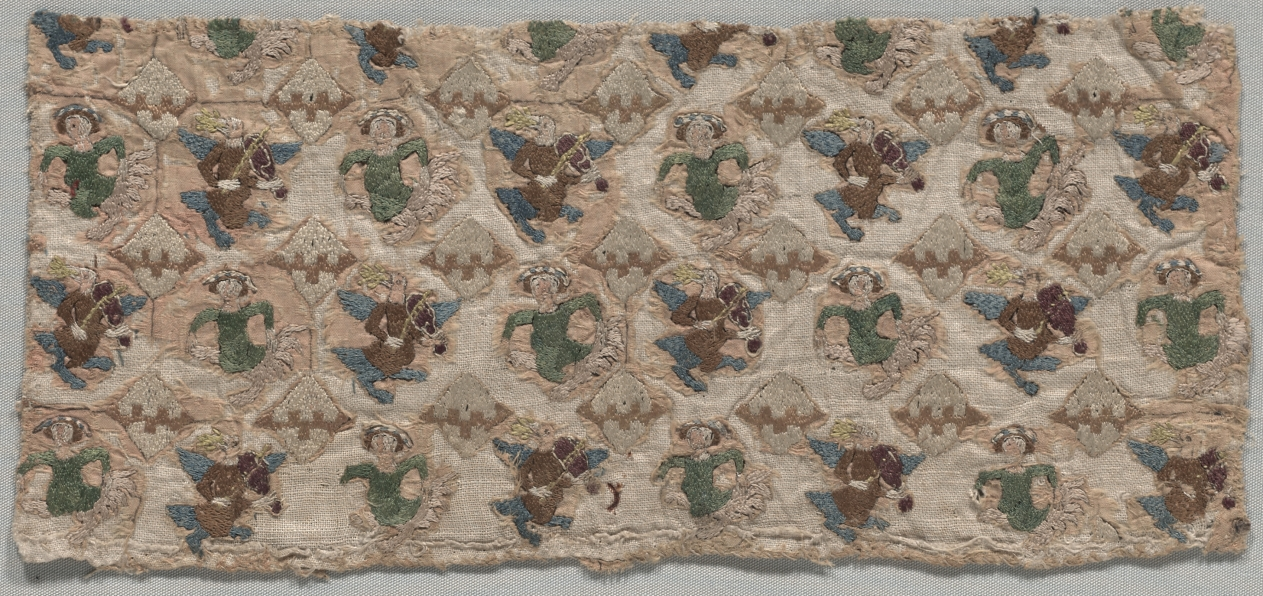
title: Embroidered Fragment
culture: Germany, Lower Saxony, mid to 3rd quarter of 14th century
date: 1350–1375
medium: embroidery; silk and gold on silk over linen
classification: Embroidery